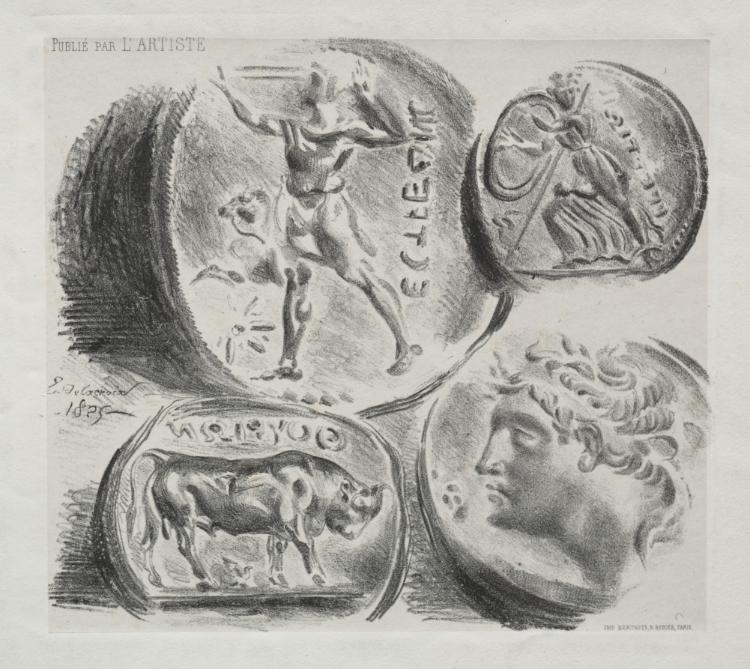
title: Sheet with Four Antique Medals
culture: France, 19th century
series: Published in L'Artiste on 1 September 1864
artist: Eugène Delacroix (French, 1798–1863)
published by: Bertauts, R. Rodier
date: 1825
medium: lithograph on chine collé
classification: Print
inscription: signed and dated, in stone: E Delacroix 1825; upper left corner, printed: Publié par L'Artiste; lower right, printed: Imp. Bertauts, R. Rodier, Paris